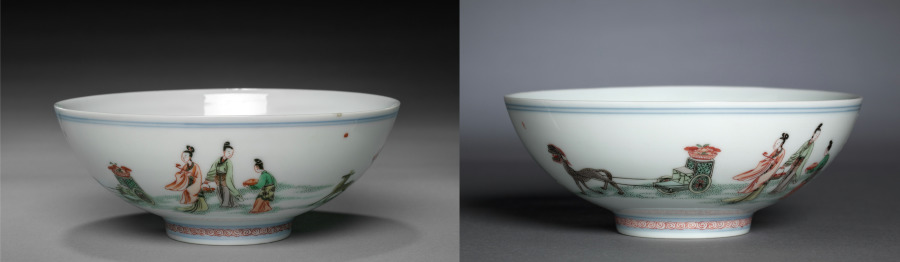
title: Pair of Bowls with Xiwangmu and Attendants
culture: China, Jiangxi province, Jingdezhen, Qing dynasty (1644-1911), Kangxi reign (1662-1722), but Chenghua mark (1465-87)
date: 1662–1722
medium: porcelain with famille verte overglaze enamel decoration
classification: Ceramic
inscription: 大明成化年製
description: Xiwangmu is the name for the Queen Mother of the West, an ancient Chinese goddess.